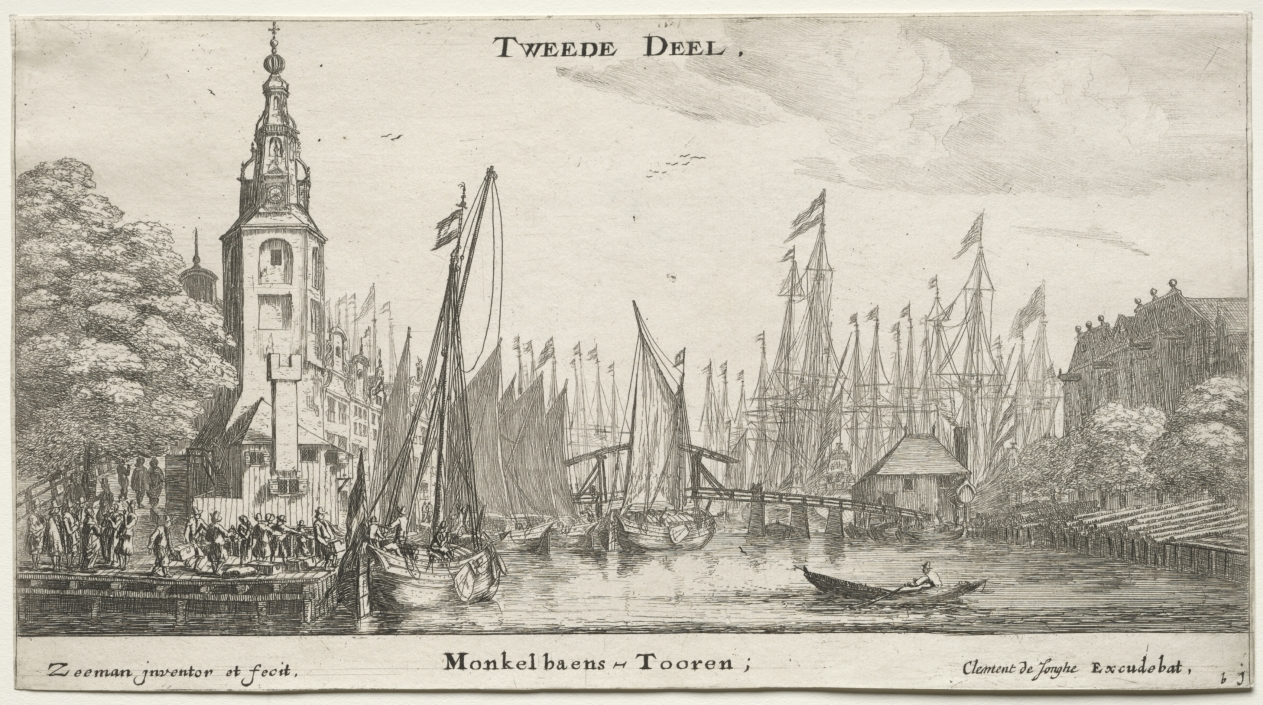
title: Various Ships and Views of Amsterdam (Verscheÿde Schepen en Gesichten van Amstelredam), Part II: Canal near Amsterdam and Tower of Monkel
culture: Netherlands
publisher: Clement de Jonghe (Dutch, 1579–1679)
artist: Reinier Nooms, called Zeeman (Dutch, c. 1623–1664)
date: 1652–54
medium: etching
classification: Print